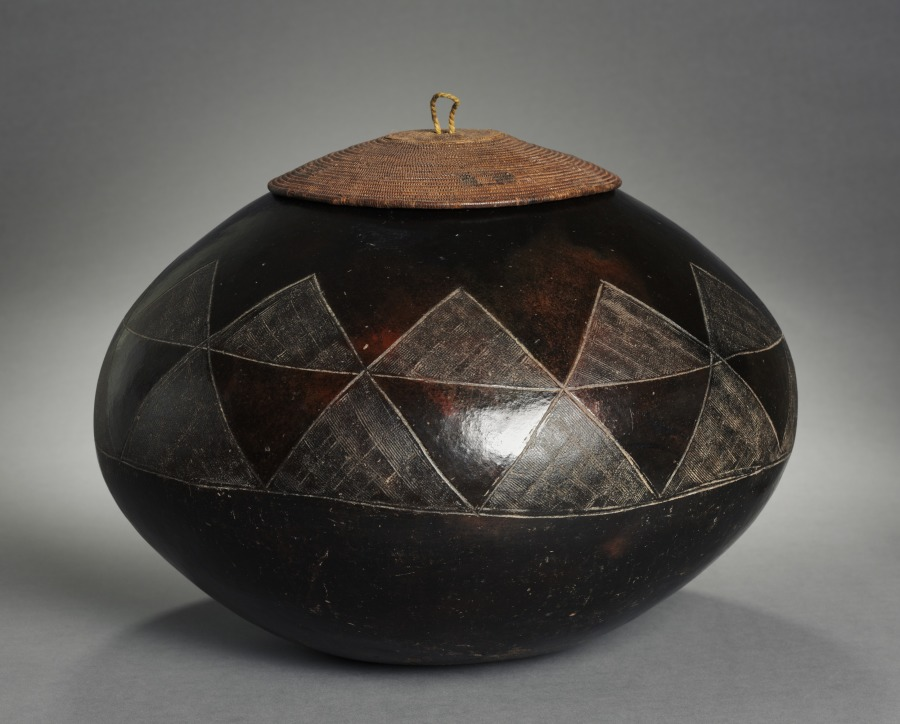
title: Lidded Pot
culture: Southern Africa, South Africa, Zulu, mid-20th century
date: 1900s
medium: Terracotta and plant fiber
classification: Vessels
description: This large, beautifully shaped vessel was used for the serving of beer, an essential component of Zulu hospitality. Undecorated vessels were for private household use, and ornamented examples were reserved for guests. Zulu pottery is produced by women, and is typically thin-walled, with a burnished black surface. Decoration may be incised around the shoulder, as in this example, or may consist of raised bumps that resemble body scarification. The basketry lid protects the vessel's contents from flies or debris; contemporary pot lids are often woven of telephone wire with a colorful plastic coating